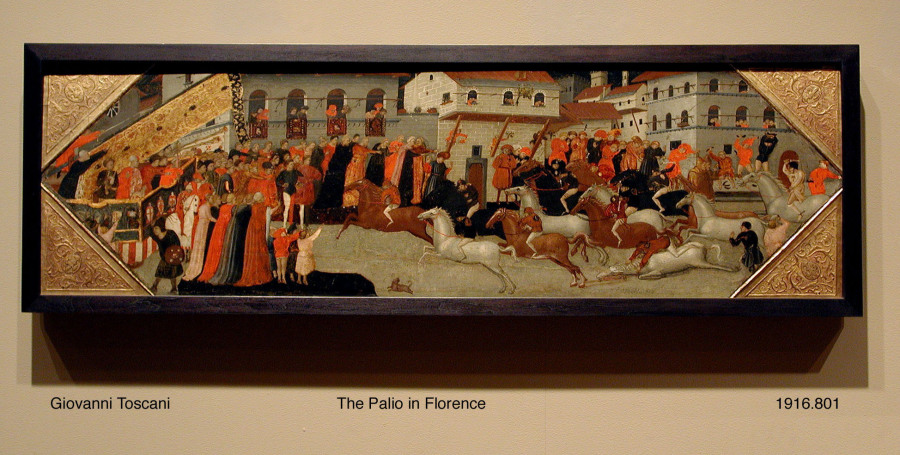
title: Panel from a Cassone: The Race of the Palio in the Streets of Florence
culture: Italy, Florence, 15th century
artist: Giovanni Francesco Toscani (Italian, c. 1380–1430)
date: 1418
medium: tempera and gold on wood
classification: Painting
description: A cassone was a wooden chest used for the storage of clothing, an essential piece of furniture in Italian homes during the Renaissance and often produced in matched sets. The cassone was often made on the occasion of a marriage and elaborately decorated with painted scenes and gilded moldings. This panel comes from such a painted cassone. It was not uncommon for the painted decoration to represent a memorable event at the time of the marriage. This scene depicts the end of the Palio, a horse race held in the streets of Florence on the Feast of John the Baptist (June 24). The panel from the other side of the cassone is now preserved in the Bargello Museum in Florence and shows the procession of the Palii banners before the race. The cassone commemorates a wedding between members of the Fini and Aldobrandini families in 1418.